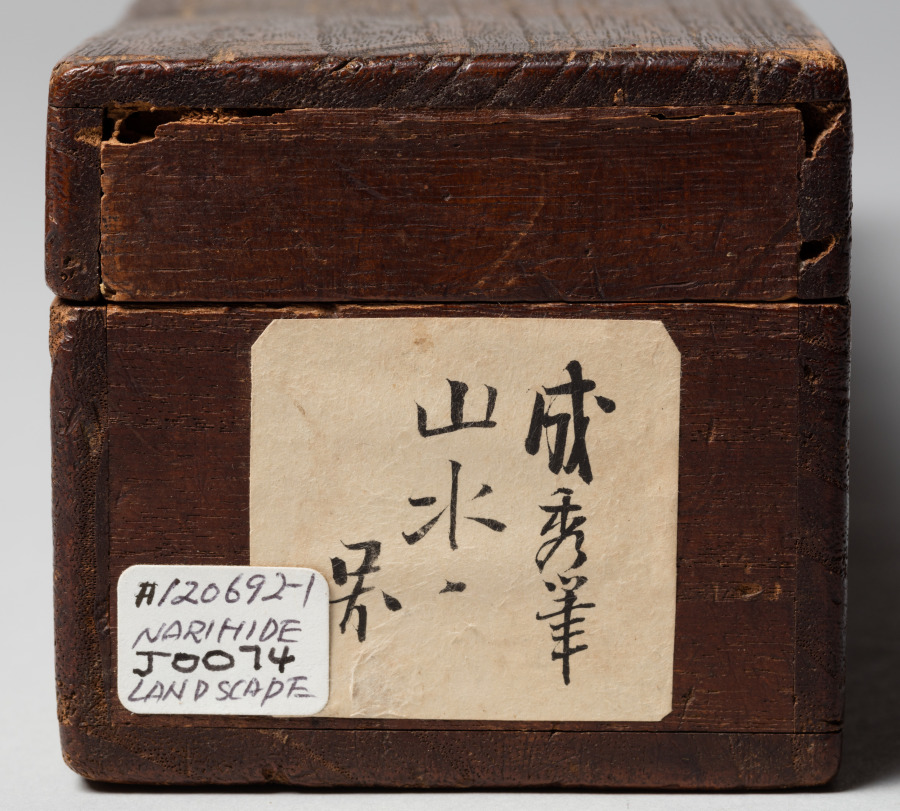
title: Landscape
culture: Japan, Muromachi period (1392–1573)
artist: Narihide (Japanese, active 1500s)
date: 1500s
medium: hanging scroll; ink on paper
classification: Painting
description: This composition includes imagery from the Eight Views of the Xiao and Xiang Rivers. Scanning the composition from top to bottom, at least six of the views are discernible: night rain over Xiao and Xiang, evening bell from a mist-shrouded temple, returning sails off a distant shore, geese descending to a sandbar, mountain village in clearing mist, and sunset glow over a fishing village. Inside the painting’s box is a document with a long inscription by prominent calligrapher, collector, and connoisseur Maeda Kōsetsu (1841–1916) discussing the painting’s subject and the matter of the painter’s biography—he appears to have been a Kano school artist, but his precise identity is unclear.